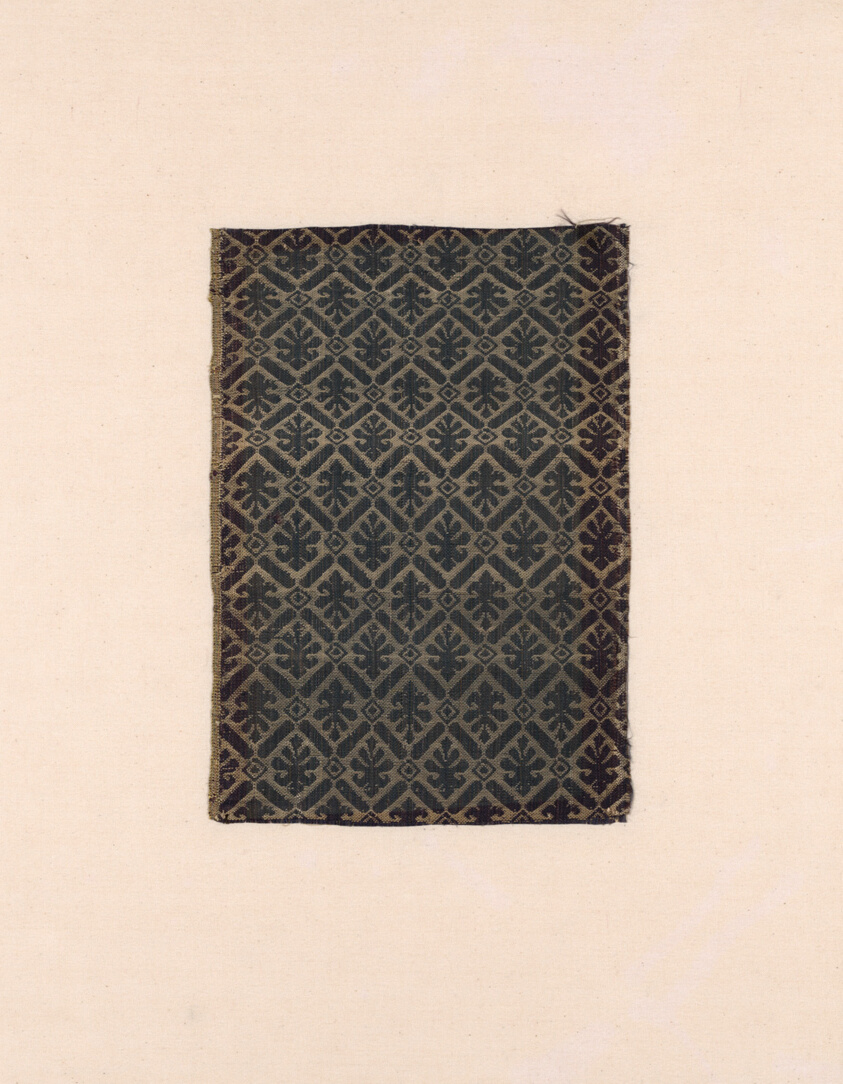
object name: Textile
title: Fragment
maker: Italy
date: 1575/1600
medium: Silk, plain weave with supplementary patterning wefts bound by main warps in plain interlacings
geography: Italy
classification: textile; weaving